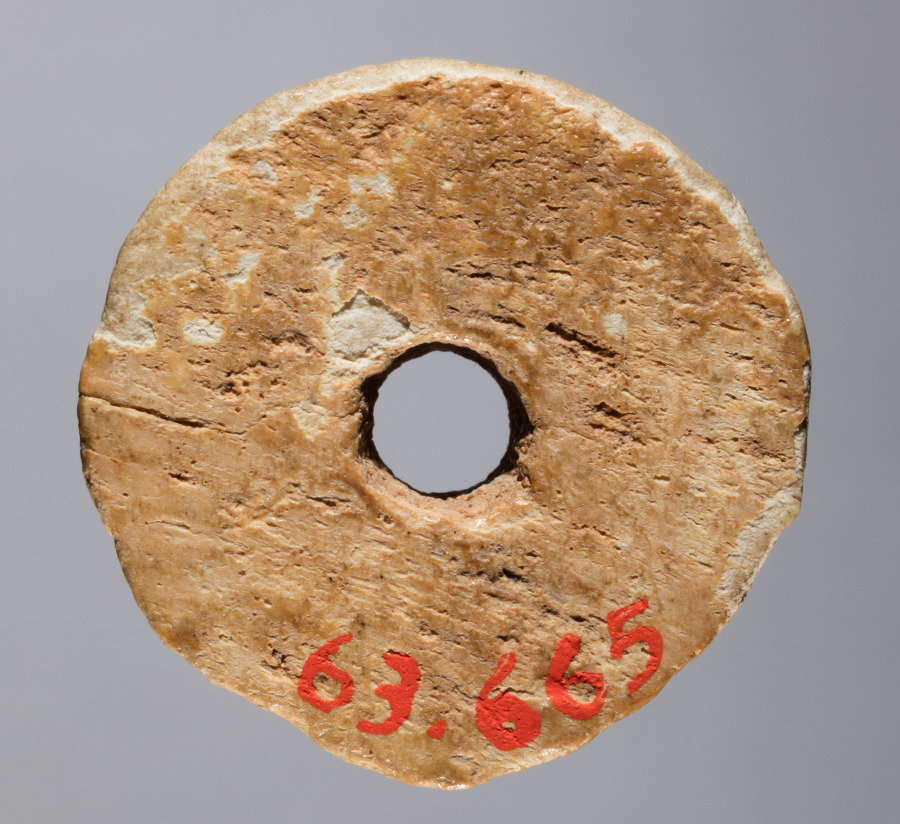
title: Spindle Whorl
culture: Iran, early Islamic period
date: 700s - 900s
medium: bone, incised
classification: Spindle Whorl